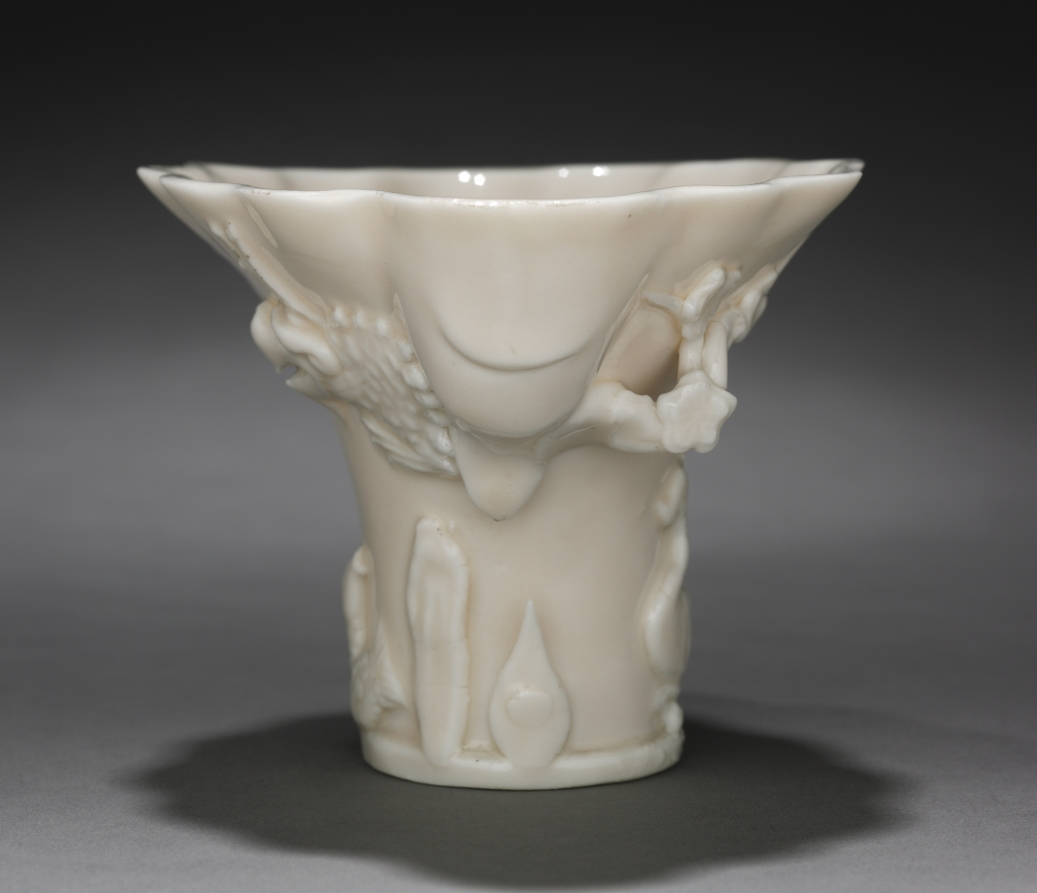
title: Libation Cup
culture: China, Qing dynasty (1644-1911), Kangxi reign (1661-1722)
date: 1662–1722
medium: porcelain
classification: Ceramic